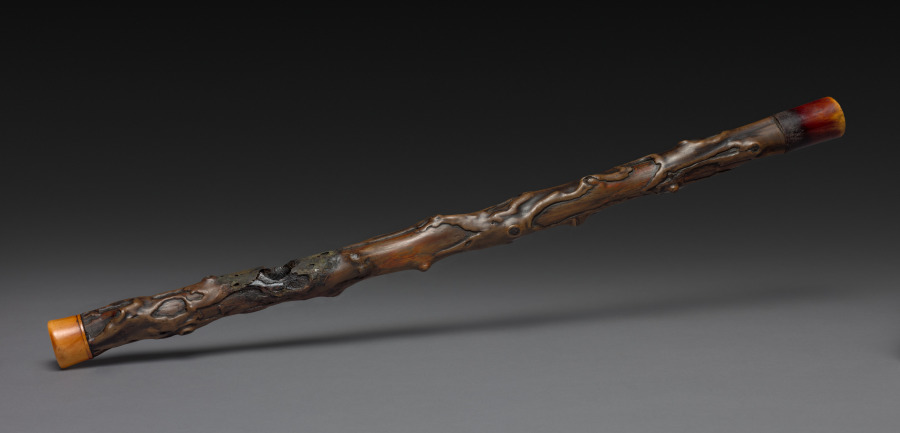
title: Opium Pipe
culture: China, Qing dynasty (1644-1911)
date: 1800s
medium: wood and ivory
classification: Miscellaneous